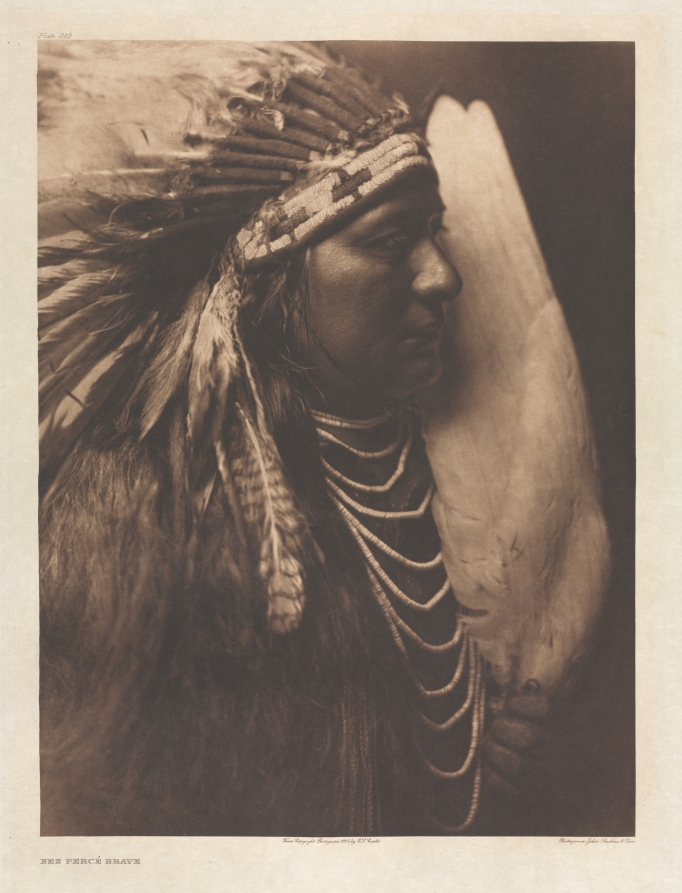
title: Portfolio VIII, Plate 263: Nez Percé Brave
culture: America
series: The North American Indian: being a series of Portfolios picturing and describing the Indians of the United States, the Dominion of Canada, and Alaska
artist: Edward S. Curtis (American, 1868–1952)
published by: The University Press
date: 1905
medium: photogravure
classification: Portfolio